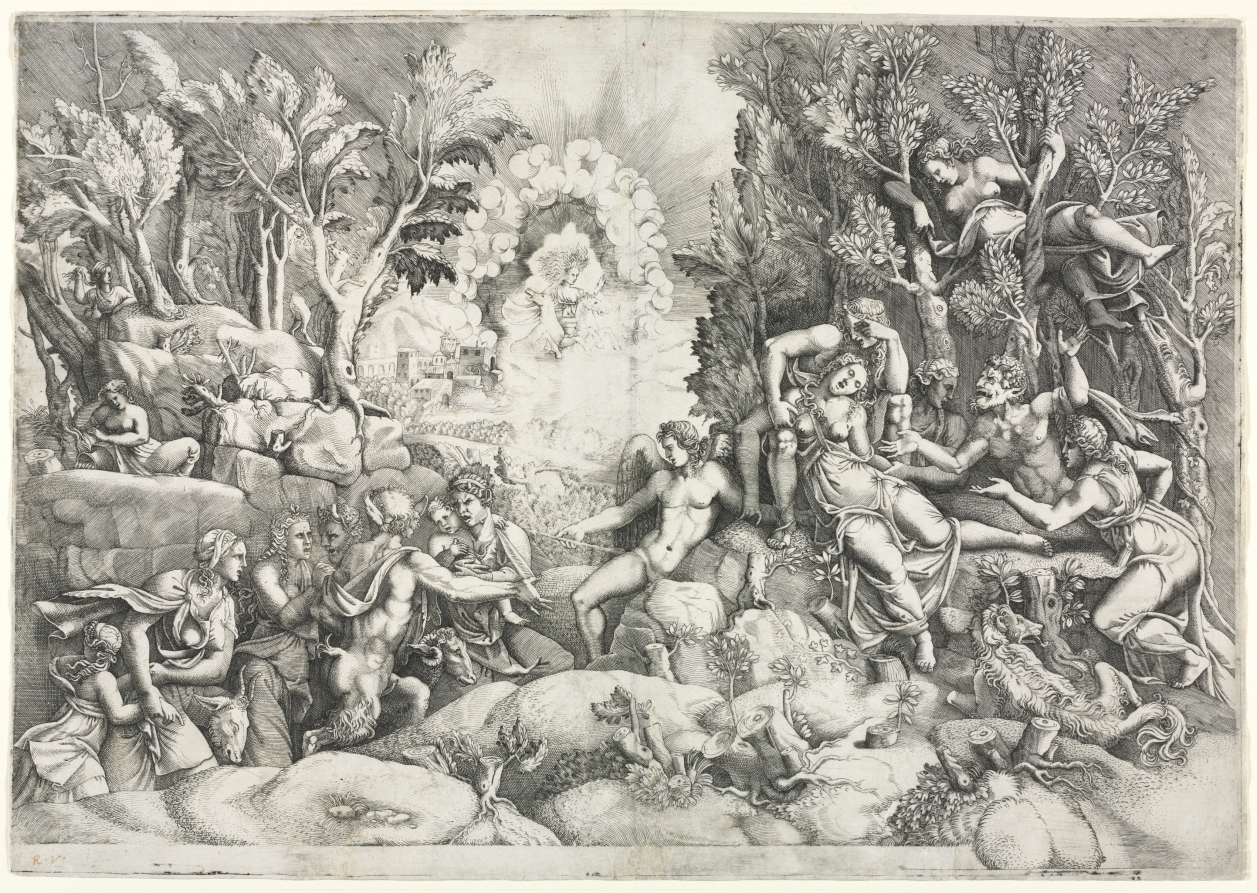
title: The Death of Procris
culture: Italy, 16th century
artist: Giorgio Ghisi (Italian, 1520–1582)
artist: after Giulio Romano (Italian, 1492/99–1546)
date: c. 1540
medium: engraving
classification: Print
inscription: lower left, in pen and brown ink: R.V.; lower right, in graphite: G Ghisi[?erased] ; VERSO, upper right, in graphite: 6[circled] ; lower left, in graphite: APG7762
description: In the complicated tale of Procris and Cephalus, told by the poet Ovid (43 BC–AD 17), jealousy tragically thwarts their true love and fidelity. Fearing that Cephalus loves a nymph, Procris spies on her husband while he is hunting. When Cephalus hears Procris rustling in the woods, he mistakes her for game and throws his magical spear that never misses its mark. In this print, the chorus of expressive satyrs and nymphs mourning her death highlights the heartbreaking drama of this love story. Romano’s intricate composition also includes Aurora, the goddess of dawn, in her chariot, and distant buildings that refer to the couple’s home in Athens.